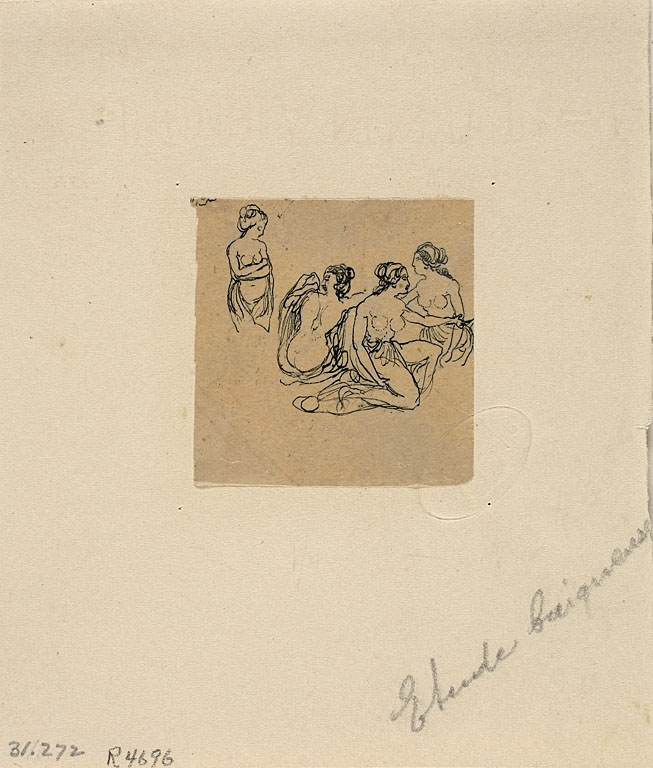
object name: Drawing and Watercolor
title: Study of Bathers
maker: Rodolphe Bresdin (French, 1825-1885)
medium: Pen and black ink, on tan wove paper, laid down on buff wove paper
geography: France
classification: pen and ink drawings; drawings (visual works); prints and drawing